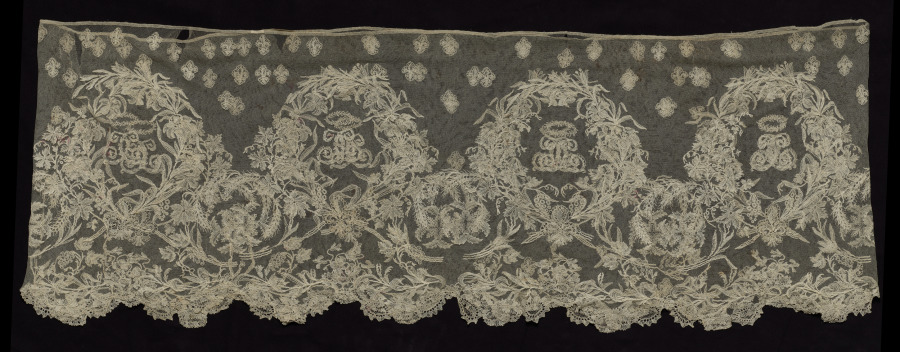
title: Lace Flounce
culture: Belgium, Brussels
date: 1811–99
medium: Machine-made net lace ground with needle lace (point a l'aiguille) appliqué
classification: Lace